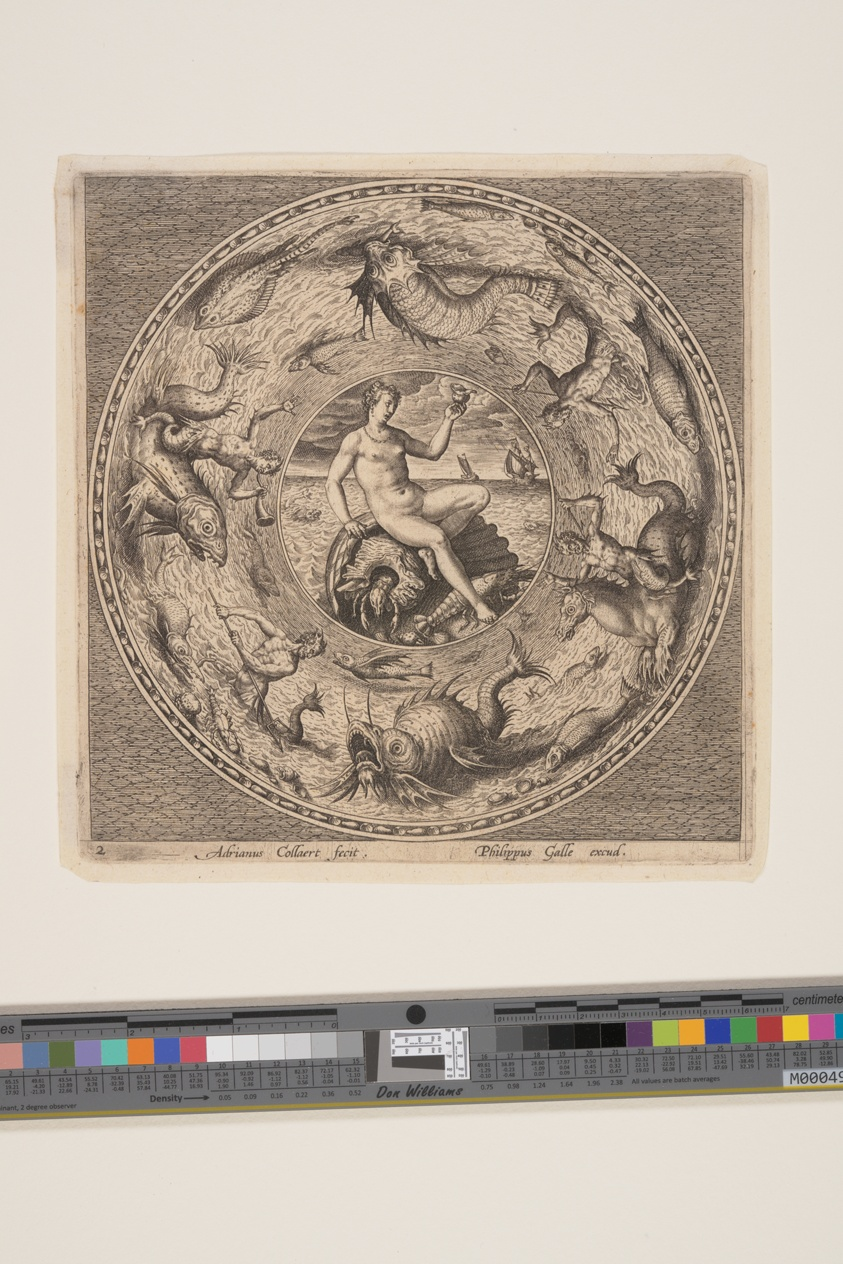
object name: Print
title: Thetis on a Shell, from a Set of Designs for Plates (Fonds de Coupe)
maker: Adriaen Collaert (Flemish, c. 1560–1618); published by Philips Galle (Netherlandish, 1537–1612)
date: c. 1580-1600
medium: Engraving on laid paper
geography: Flanders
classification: engraving; paper; print; prints and drawing